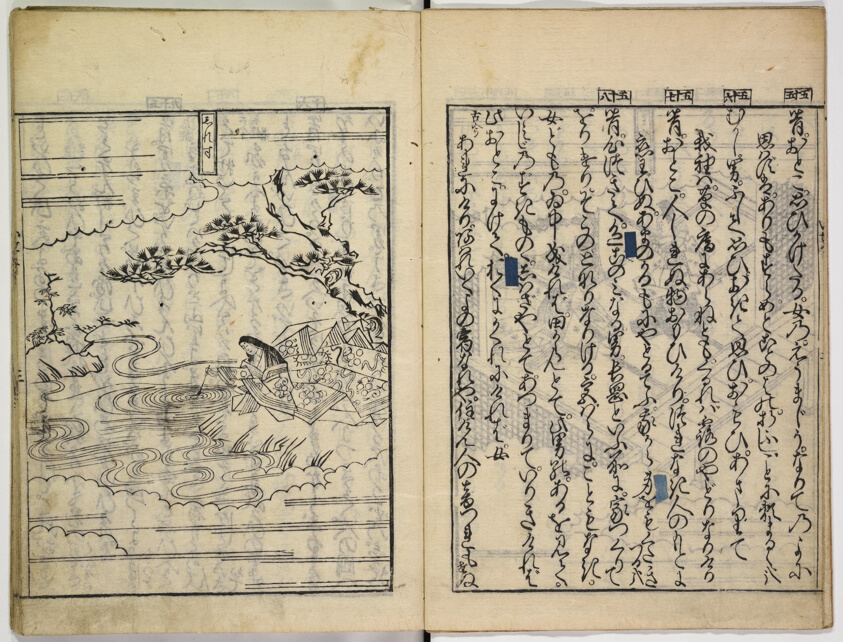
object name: Book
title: Tales of Ise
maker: Artist unknown, Japanese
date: 1700 Genroku 13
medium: Woodblock-printed Books; 1 vol.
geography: Japan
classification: book